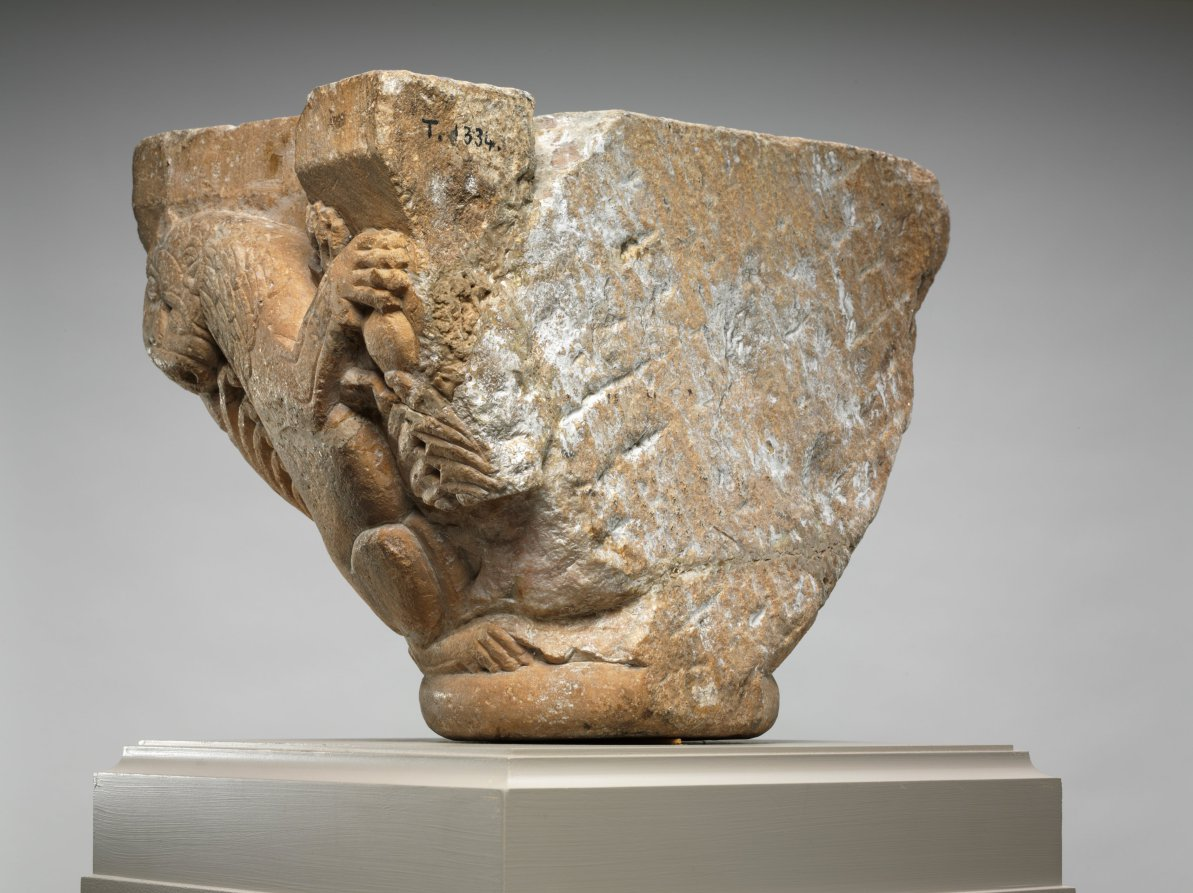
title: Engaged Capital with Lions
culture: Northern Spain (Navarre ?) or Southwest France (Pyrénées or Roussillon ?), mid-12th century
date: 1145–64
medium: marble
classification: Sculpture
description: The compositional motif of confronted and addorsed beasts illustrated on this capital was especially popular in churches along the pilgrimage roads.